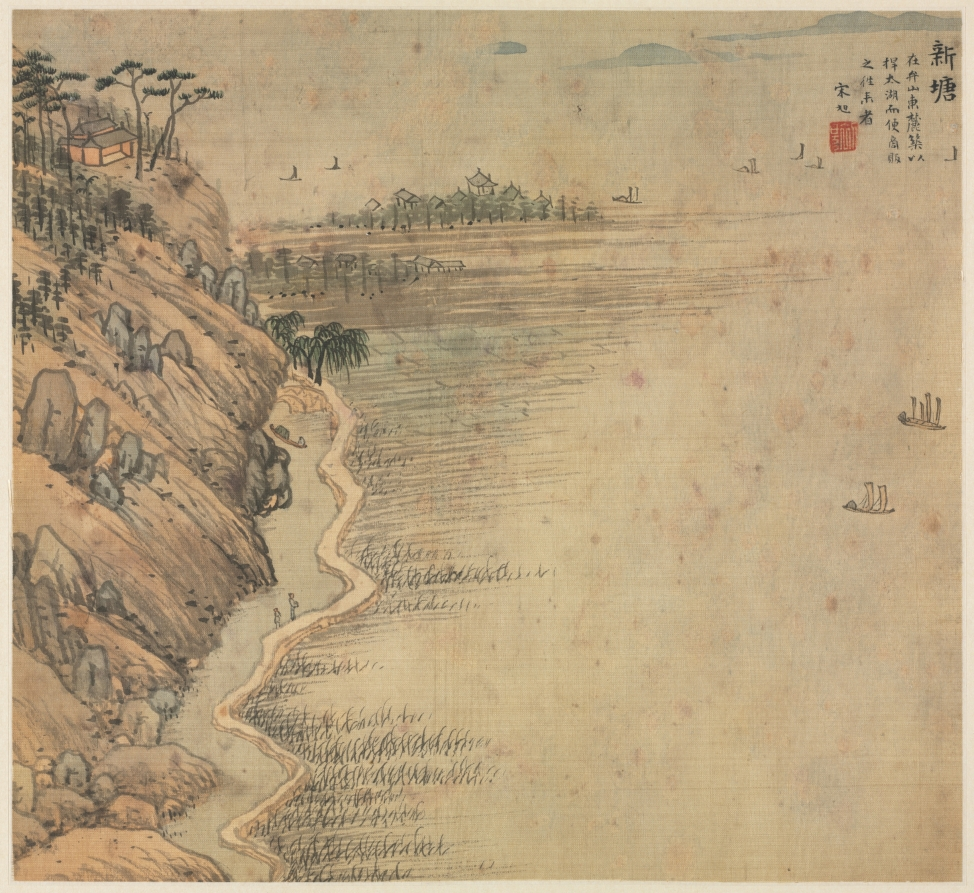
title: Xintang (Immortal's Peak)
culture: China, Jiaxing, Ming dynasty (1368–1644)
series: Eighteen Views of Huzhou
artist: Song Xu (Chinese, 1525-c. 1606)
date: c. 1588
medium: Album leaf; ink and color on silk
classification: Painting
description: By the 1500s, visits to historic and scenic sites in the lower Yangzi delta stimulated an increase of printed illustrated travel books. Topographical depictions of local scenery flourished. Leaves from this album illustrates sites around Lake Tai of the two adjacent counties Changxing and Wuxing (modern Huzhou). Song Xu, who lived intermittently in Jiaxing and Songjiang, must have passed through Wuxing by boat and thus knew the region. The paintings are inscribed with gazetteerlike notations, suggesting that the album was produced for clients as commemorative works, a travel guide, or for “armchair travel” (woyou) in one’s mind.